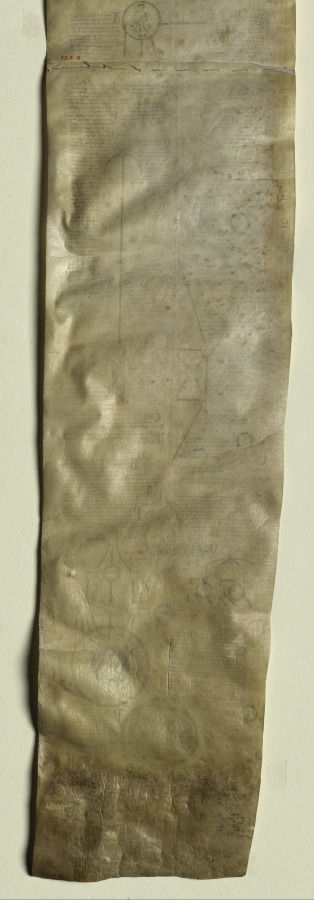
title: Peter of Poitiers's "Compendium Historiae in Genealogia Christi"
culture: England, Canterbury, 13th century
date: c. 1220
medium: ink and tempera on a vellum roll of four membranes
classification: Manuscript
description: This manuscript roll, composed of four membranes formerly stitched together in a continuous roll about nine feet long, has been divided in the middle for easier visibility and study. The text is an abridgment of biblical history focused on the descent of Christ from Adam. It was written by Peter of Poitiers (about 1130–1205), who taught theology and history in Paris and was widely copied. The present roll is an English copy of Peter's text made shortly after his death. Although manuscript rolls were hung on the walls of a classroom as instructional aids to students, some of them have value beyond their textual and historical interest because of the fine quality of their drawings, as seen here. A comparison with Canterbury manuscripts and stained glass of around 1220 is the basis for the attribution to Canterbury. Peter of Poitiers's aim in this project was to assist students prevented from mastering biblical history because of its length and because they were too poor to own books. His text on roll is the briefest possible summary of biblical history. It is arranged in six historical stages, denoting the six ages of the world, as decreed by theological tradition. The first five ages were inaugurated by Old Testament individuals: Adam, Noah, Abraham, David, and Sedecias. The birth of Christ heralded the sixth stage. Beginning at the top of the first membrane, the text consists of brief biographical entries on the ancestors of Christ (Adam, Noah, Abraham, Moses, and David) and other biblical personalities. These extend to the birth of Christ on the fourth membrane, ending with accounts of Hebrew and Roman kings and the Apostles. Each compendium shows the names of the ancestors inscribed within circles, those of direct descent placed vertically in a central column, others scattered in clusters to the right and left. The decoration of the roll consists of a series of medallions of diverse geometrical frames filled with either a figural drawing or a diagram. The style of these pen-and-ink drawings, some illuminated in tempera or tinted with wash, stems from English manuscript and glass painting attributed to the school of Canterbury Cathedral. The style of the museum's illustrations is so close to the stained glass panels made for Trinity Chapel at Canterbury (about 1220) to suggest that an artist active as a glazier in the Cathedral workshop may also have executed the manuscript. In the least, the painter of the roll manuscript was familiar with the style of the painted glass, and on this basis, a date of about 1220 seems appropriate. Additional evidence is supplied by a psalter illuminated at Canterbury shortly before 1220. The figurative scenes in this psalter were apparently illustrated by the same hand that executed the line and wash drawings in the museum's roll.